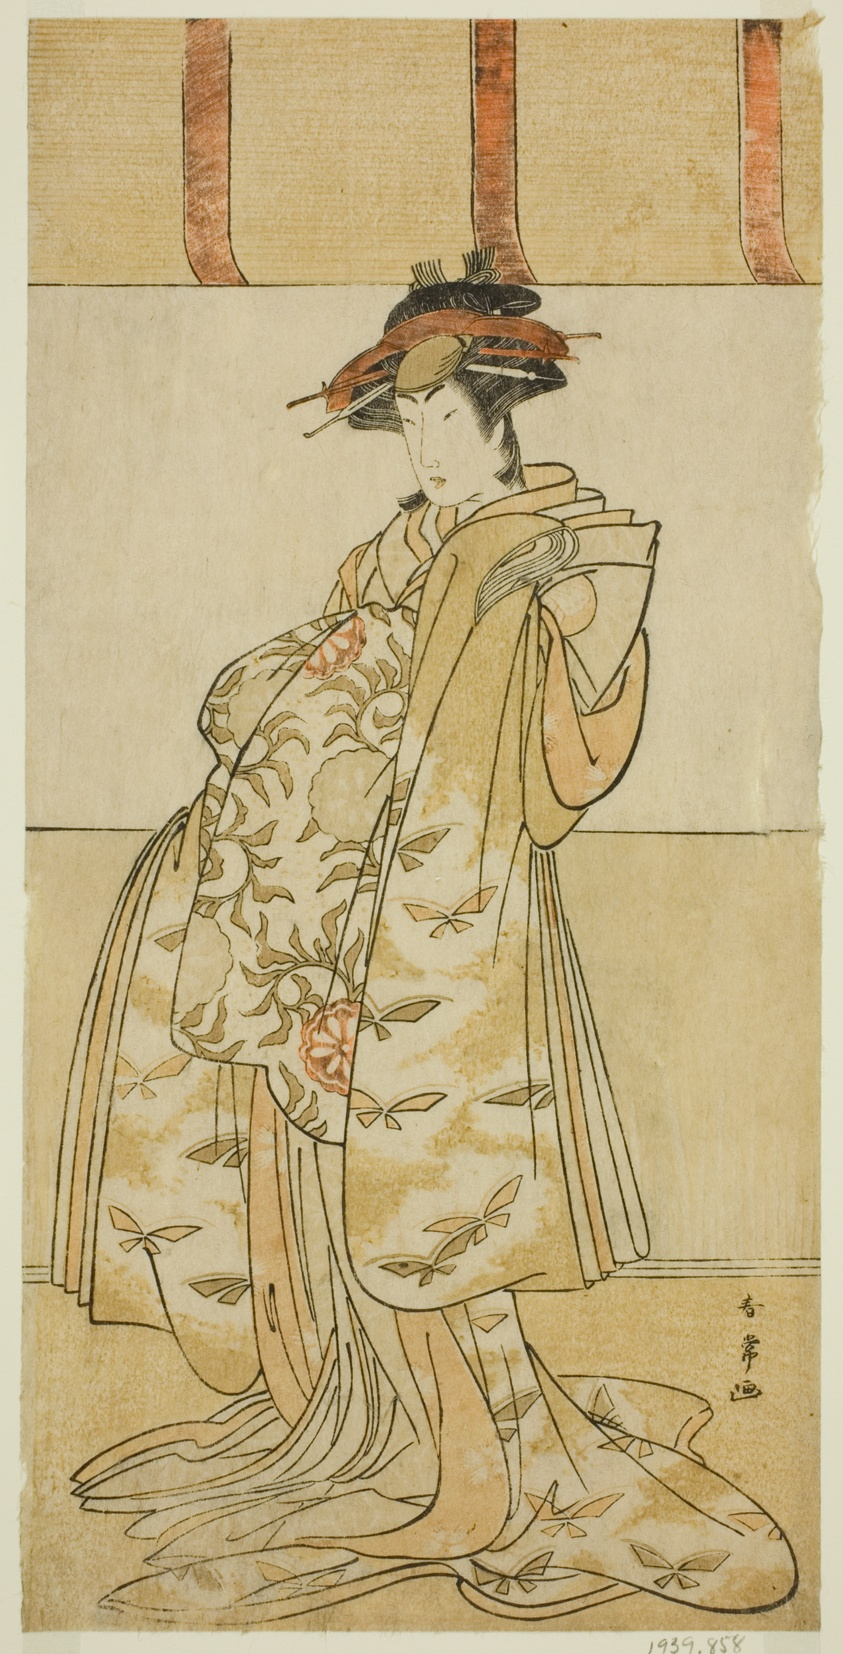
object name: Print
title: The Actor Yamashita Mangiku I as Kewaizaka no Shosho in the Play Nanakusa Yosooi Soga, Performed at the Nakamura Theater in the First Month, 1782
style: Japanese (culture or style)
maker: Katsukawa Shunjo; Japanese, died 1787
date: c. 1782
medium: Color woodblock print; hosoban; right sheet of triptych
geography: Japan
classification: woodblock print; print; asian art